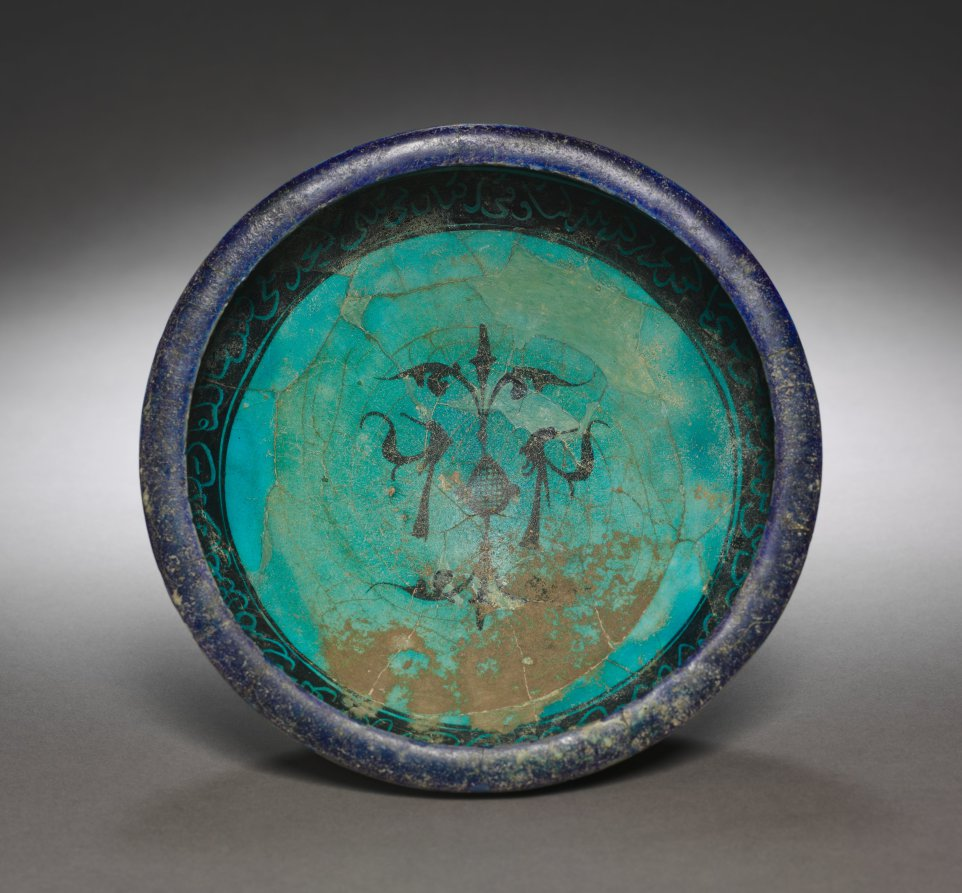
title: Bowl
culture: Iran, Kashan, Seljuq period of Iran (1037–1194)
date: early 1200s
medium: earthenware with underglaze-painted and incised design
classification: Ceramic